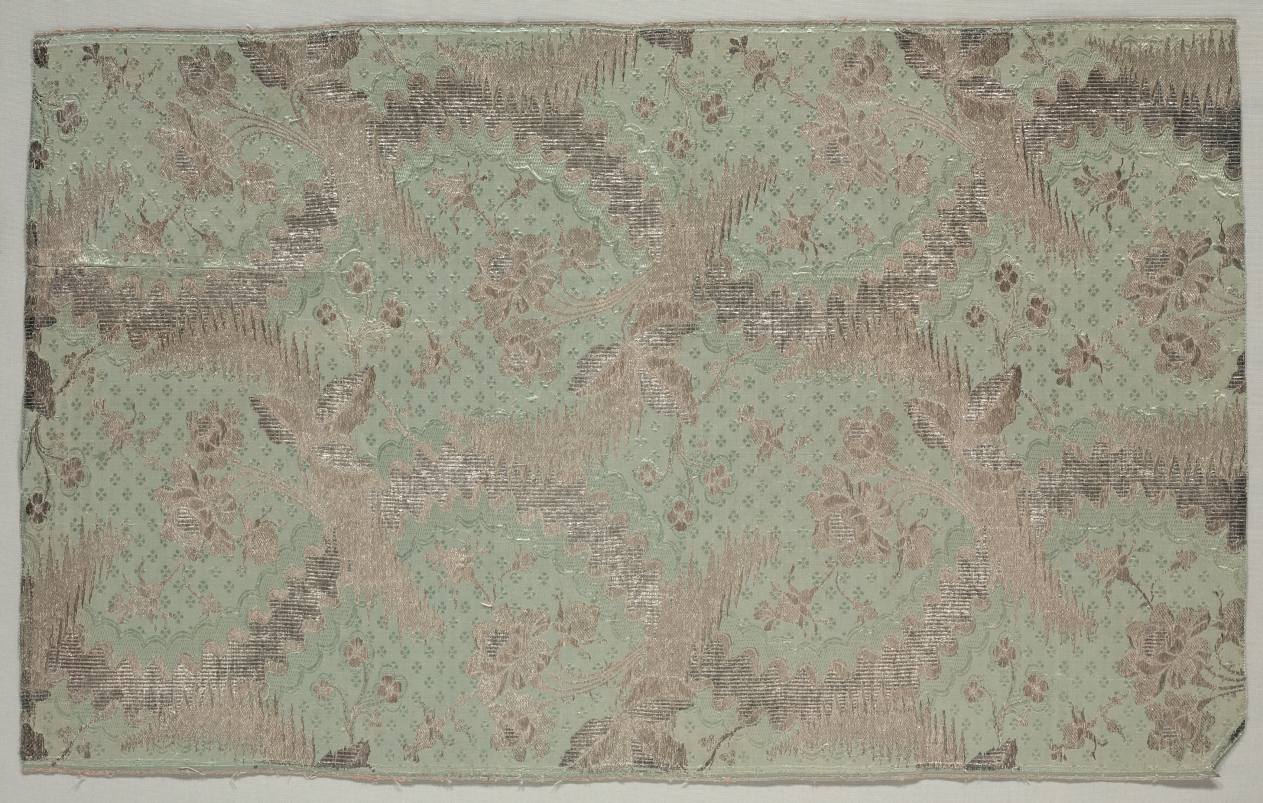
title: Length of Textile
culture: France, 18th century, period of Louis XV (1723-1774)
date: 1723–1774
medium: brocade; silk and metal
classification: Textile